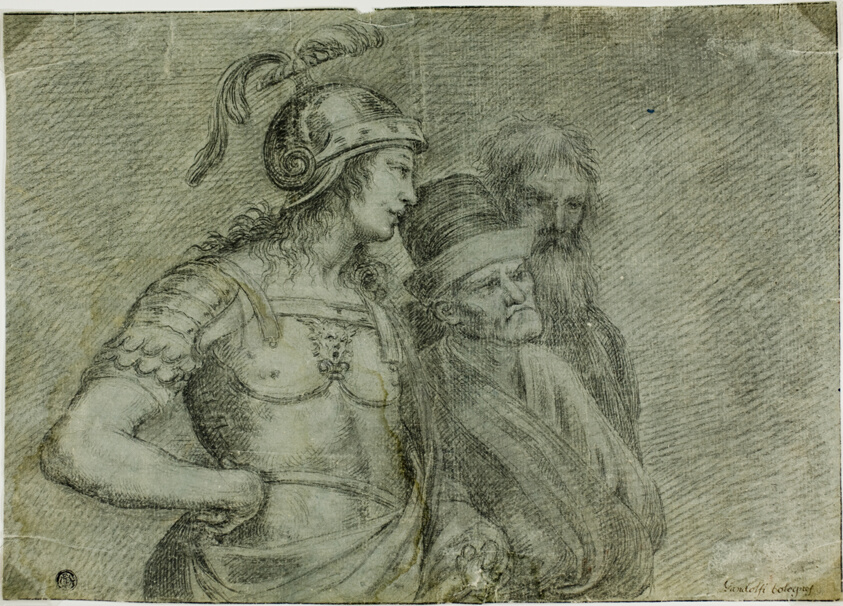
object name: Drawing and Watercolor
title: Alcibiades and Two Philosophers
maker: After Raffaello Sanzio, called Raphael; Italian, 1483-1520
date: 18th century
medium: Metalpoint and black chalk, with traces of white chalk, on pale blue-toned cream laid paper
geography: Italy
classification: chalk; drawings (visual works); prints and drawing